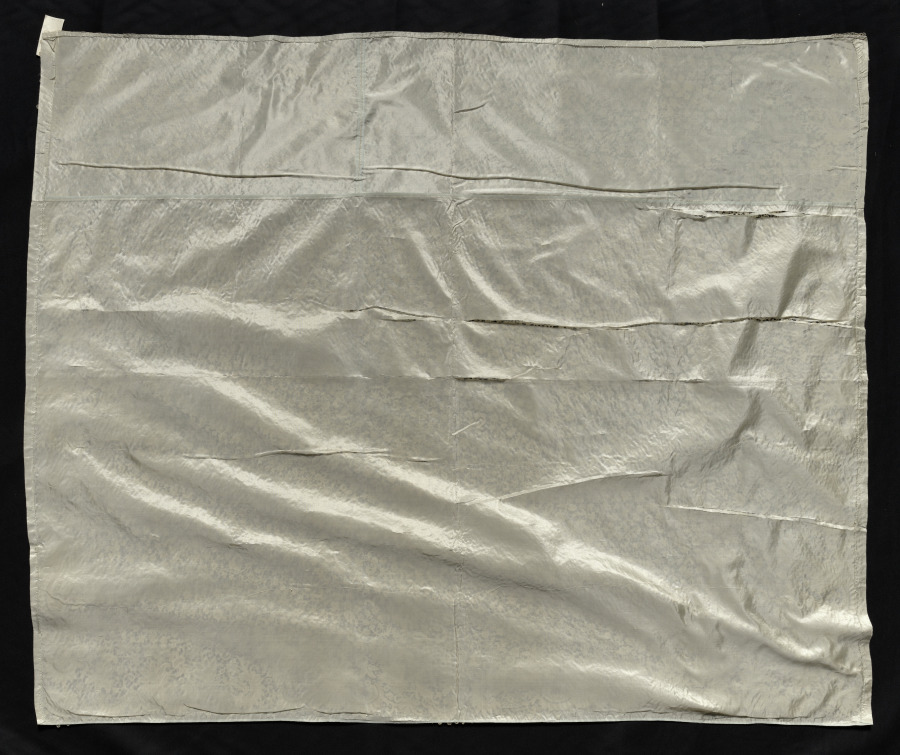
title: Lace Flounce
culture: Italy, Venice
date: 1800s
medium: Linen: needle lace (Venetian rose point)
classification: Lace